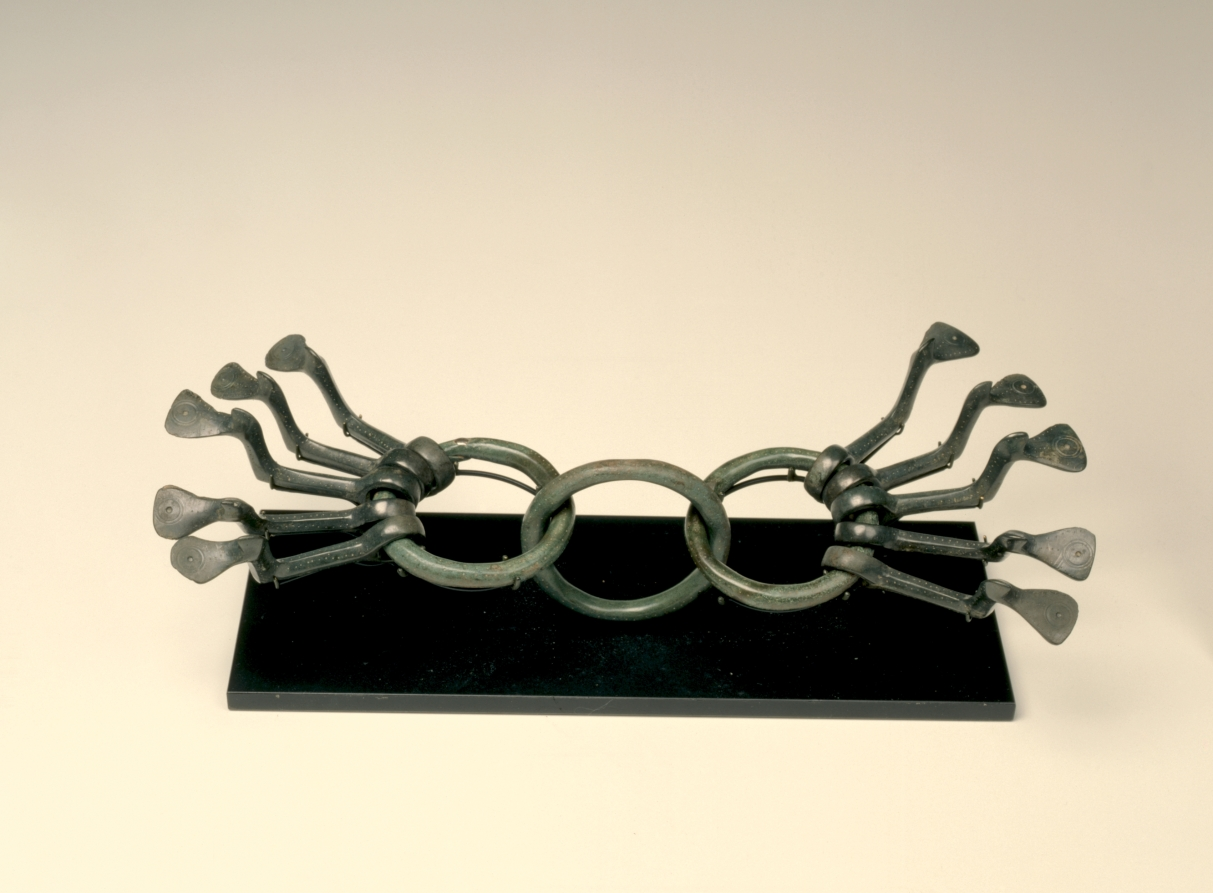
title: Cauldron Ornament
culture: Central Europe, Bronze Age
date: c. 1200 BCE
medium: bronze with iron rivets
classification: Metalwork